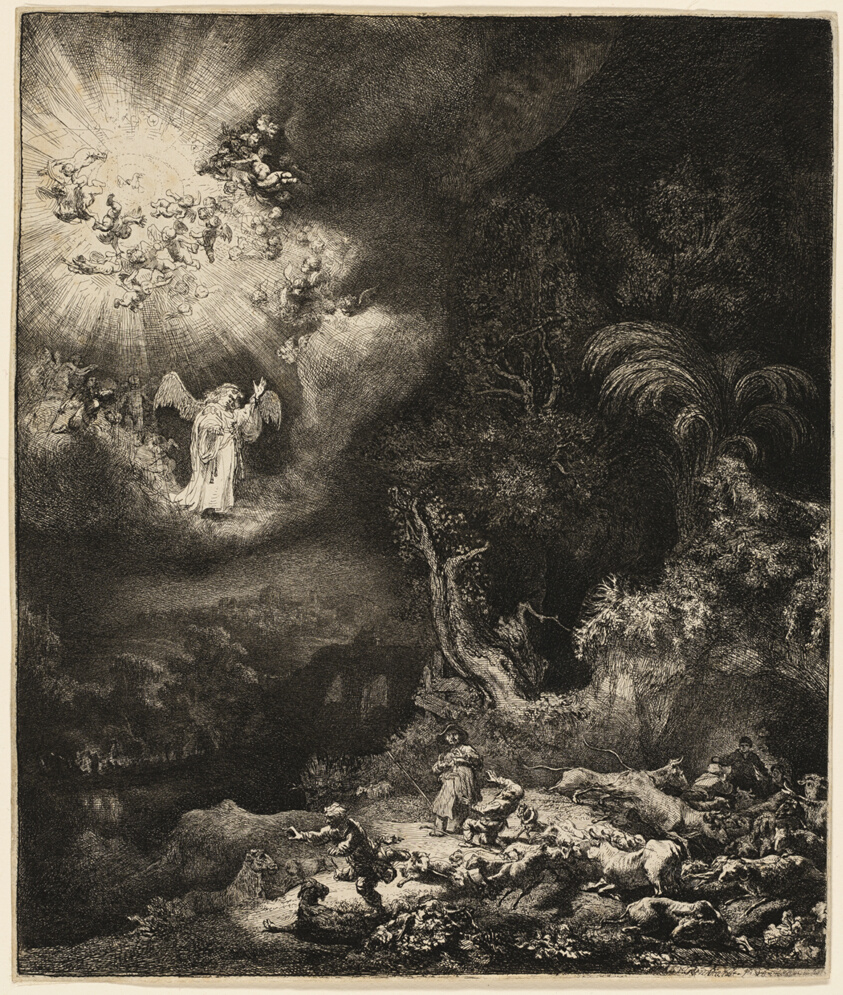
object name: Print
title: The Angel Appearing to the Shepherds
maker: Rembrandt van Rijn (Dutch, 1606-1669)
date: 1634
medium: Etching, engraving, and drypoint in black on ivory laid paper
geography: Holland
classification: etching; print; prints and drawing; paper; drypoint; engraving